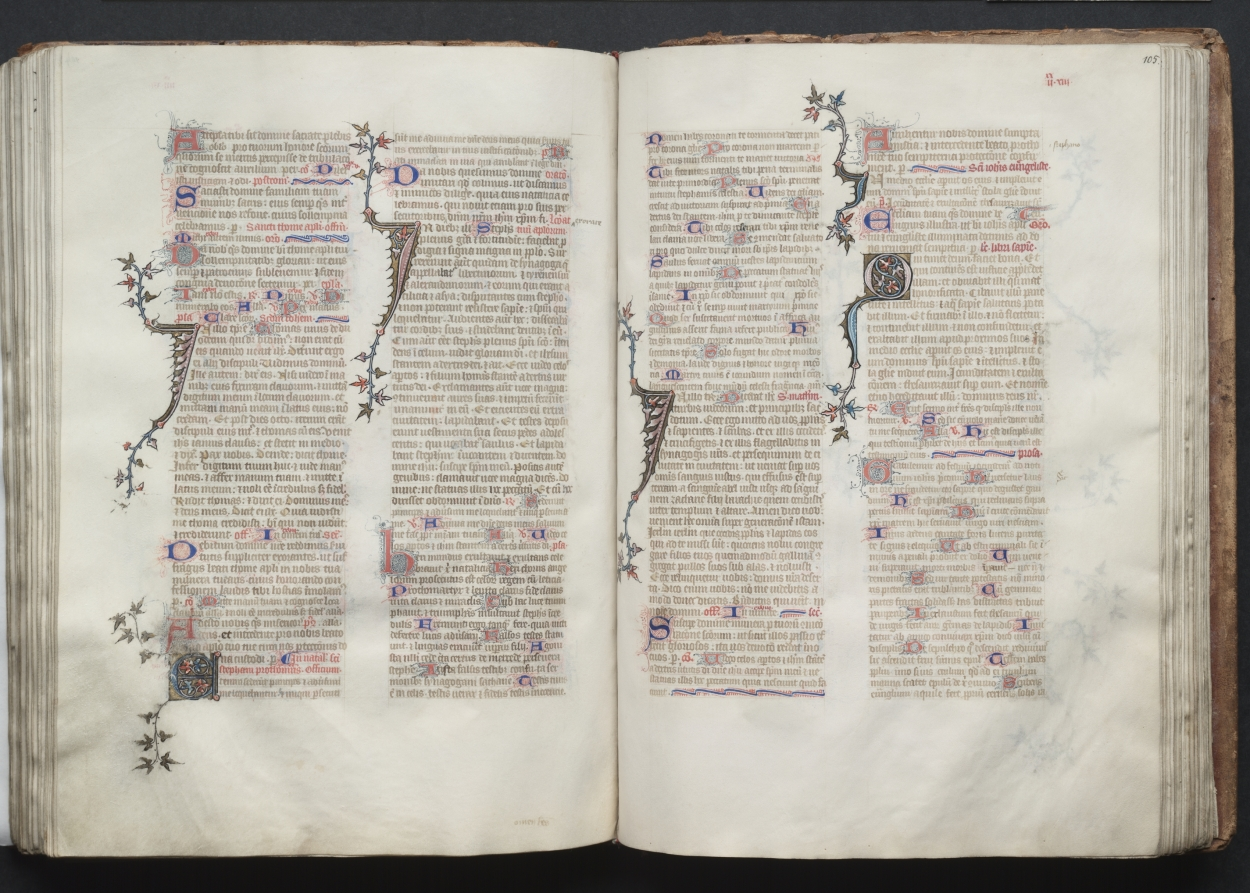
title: The Gotha Missal: Fol. 104v, Text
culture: France, Paris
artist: Master of the Boqueteaux (French)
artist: and Workshop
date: c. 1375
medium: ink, tempera, and gold on vellum; blind-tooled leather binding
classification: Bound Volume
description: The style and quality of this manuscript's decoration is typical of deluxe Parisian books made for aristocratic or royal patrons. Most of the book's decoration appears to be the work of the Master of the Boqueteaux, an artist active at the court of King Charles V (died 1380). His style was apparently shared by a number of book illuminators working in and around Paris. It is very possible that the Gotha Missal belonged to Charles V, but is not provable because the manuscript has no royal portraits and lacks a colophon. Given the book's magnificent decoration, however, it would seem that it was produced for a Valois prince, if not for the king himself. The manuscript receives its name from the German dukes of Gotha, its later owners.